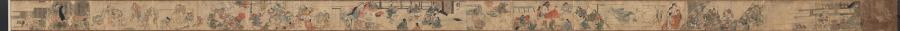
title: Oeyama Engi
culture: Japan, Edo period (1615–1868)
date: 1615–1868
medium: pair of handscrolls; ink and color on paper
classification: Painting